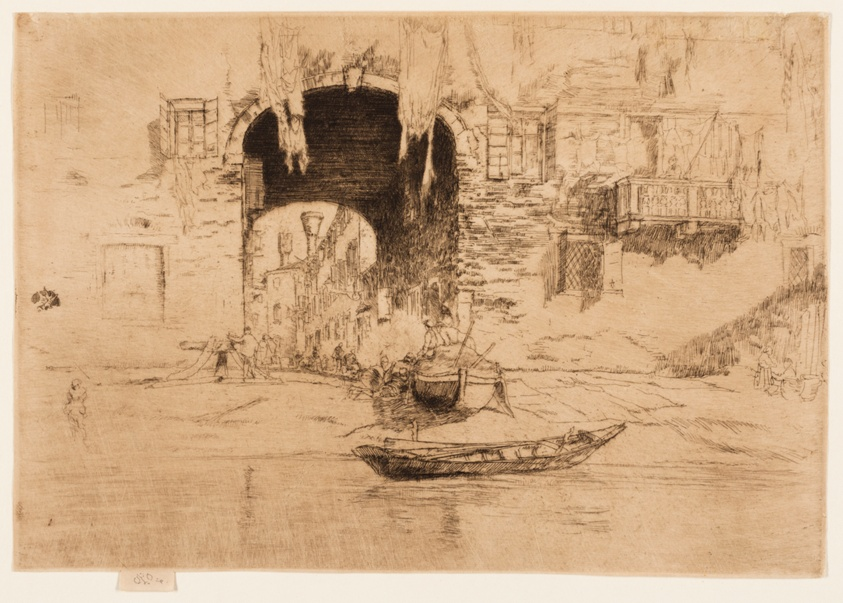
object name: Print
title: San Biagio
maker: James McNeill Whistler (American, 1834-1903)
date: 1880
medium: Etching and drypoint with foul biting in dark brown ink on ivory Asian laid paper altered to buff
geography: United States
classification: etching; foul biting; print; prints and drawing; drypoint; paper